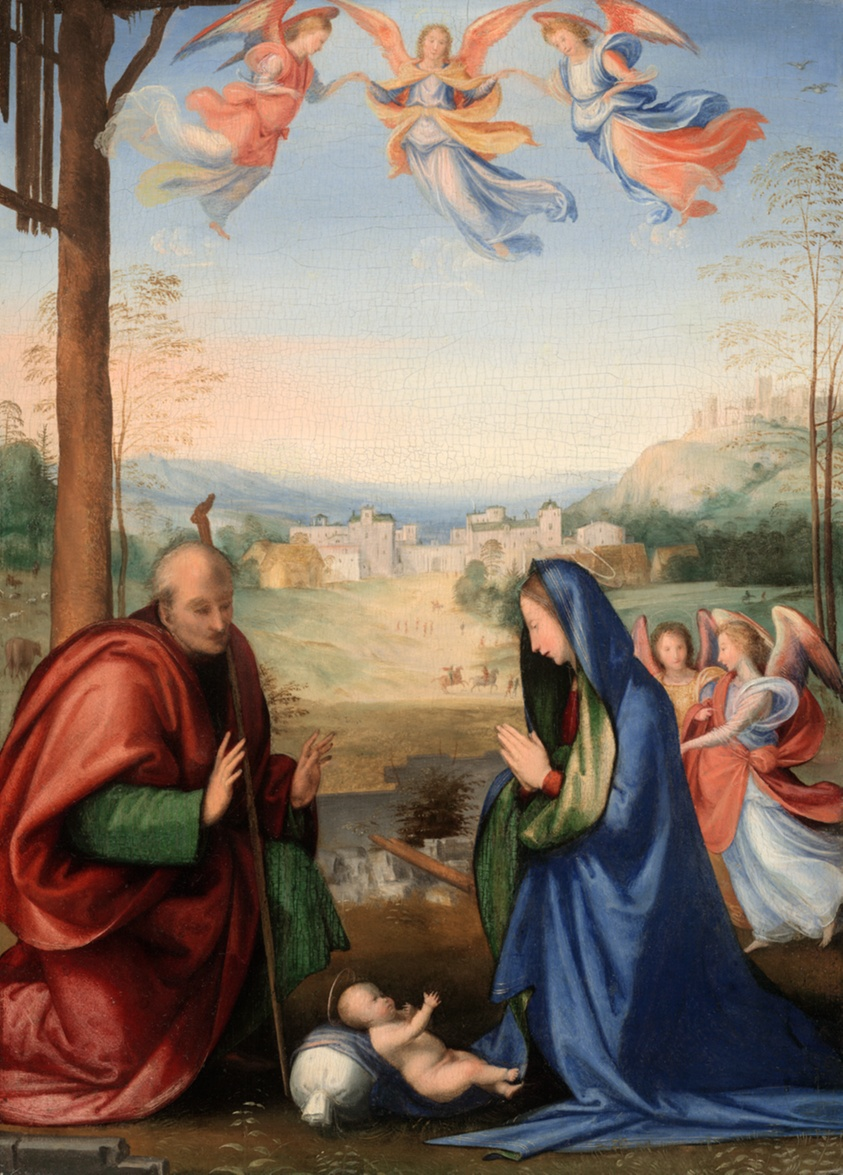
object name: Painting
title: The Nativity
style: Renaissance, 16th Century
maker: Fra Bartolommeo (Baccio della Porta; Italian, 1472-1517)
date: 1504/07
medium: Oil on panel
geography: Italy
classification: painting; european painting; Italian; paint; oil on panel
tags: women, Virgin and child/Madonna and child, Virgin Mary, saints, angels, nativity scenes, religion, children, religious scenes, Christian subjects, biblical, holy family, Christianity